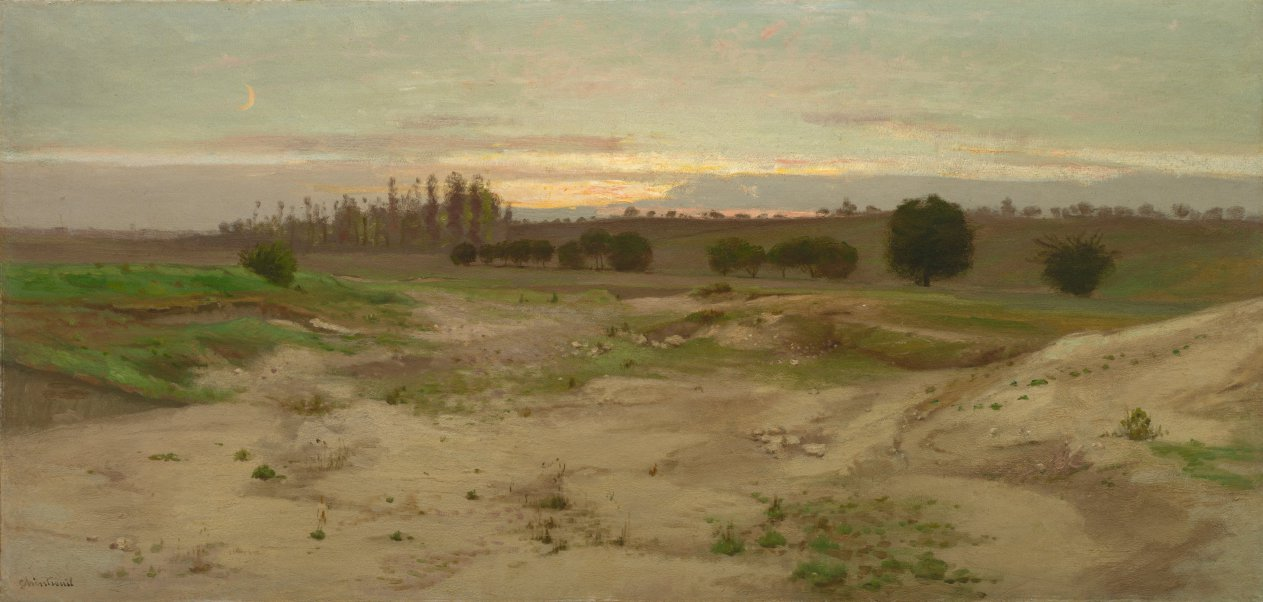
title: The Marl Pit at Mulcent: Evening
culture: France, 19th century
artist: Antoine Chintreuil (French, 1814–1873)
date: after 1857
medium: oil on paper, mounted to cardboard, mounted to plywood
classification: Painting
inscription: Signed lower left: Chintreuil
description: Marl is a crumbly mixture of clays, calcium, and magnesium carbonates, often used as fertilizer for lime-deficient soils.